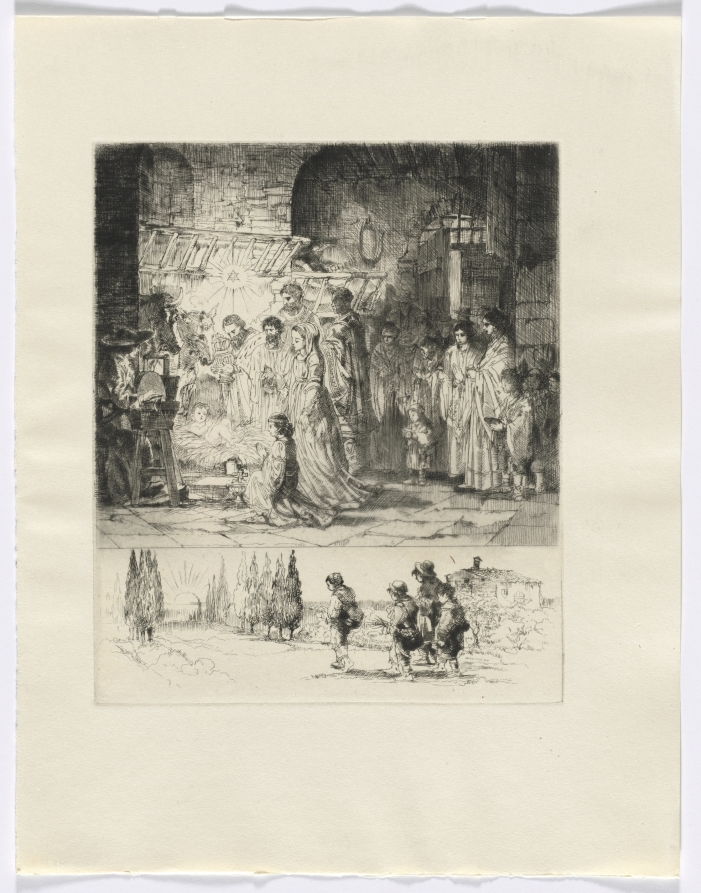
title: Frédéric Mistral: Mémoires et Recits by Frédéric Mistral: nativity/ figures walking on a road (insert after p. 32)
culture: France, 20th century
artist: Auguste Brouet (French, 1872–1941)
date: 1937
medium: etchings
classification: Portfolio